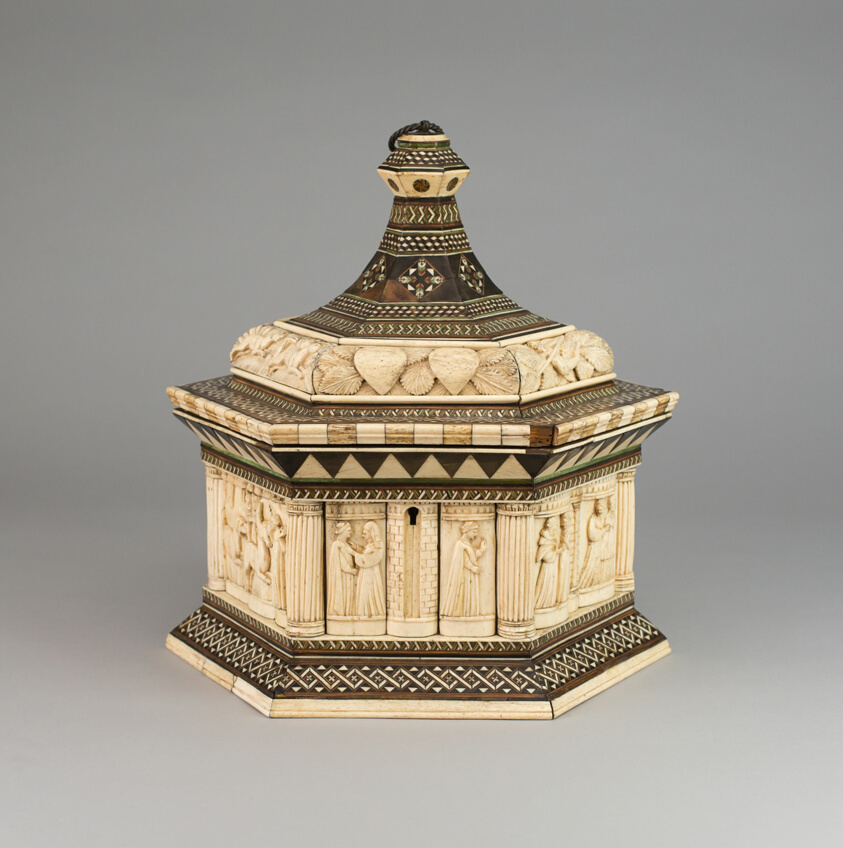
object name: Decorative Arts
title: Casket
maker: Embriachi Workshop (Florence, Italy, c. 1370-1395 and Venice, Italy, 1395-c. 1420); Italian; Venice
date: c. 1390-c. 1410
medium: Bone, cow horn, wood, iron, and silk velvet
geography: Venice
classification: wood; european decorative arts; decorative arts